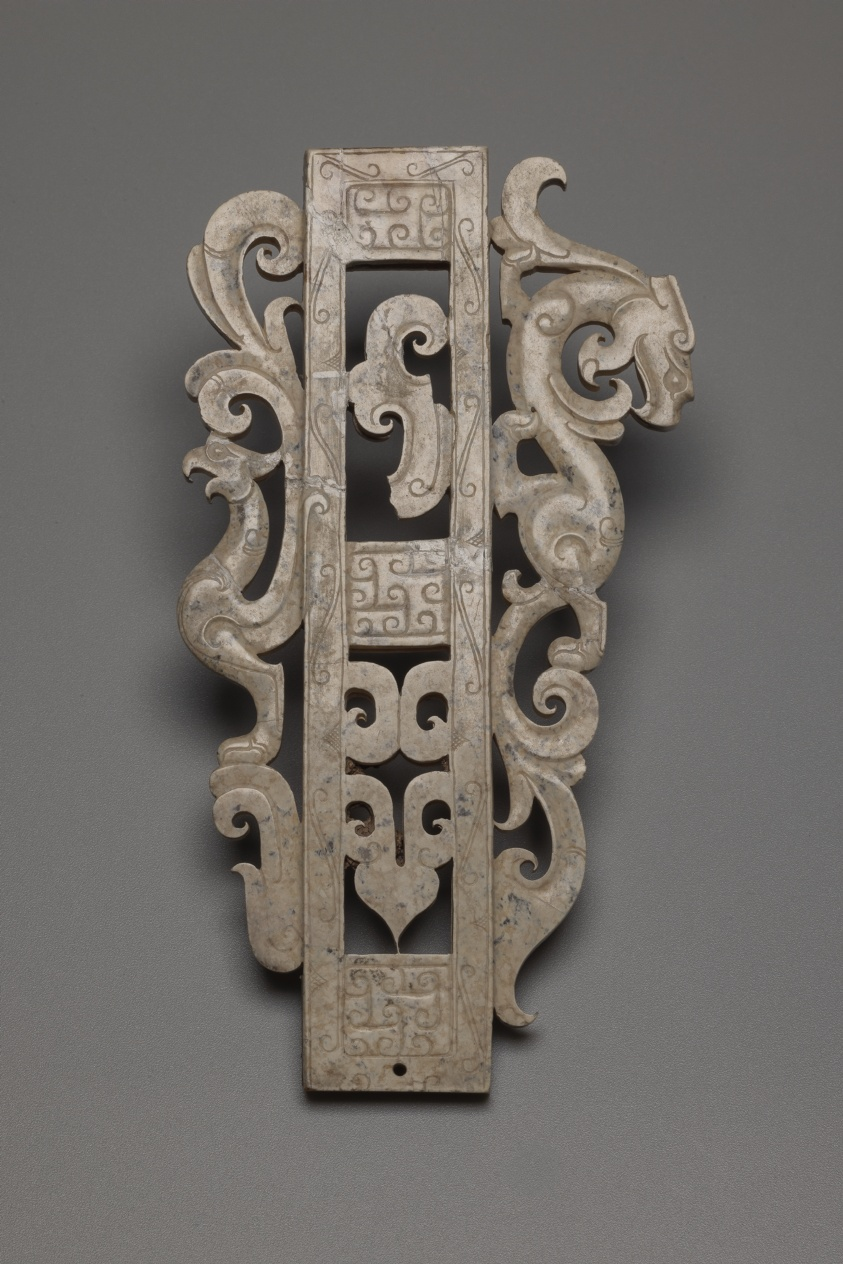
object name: Religious/Ritual Object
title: Sheath with Bird and Feline or Dragon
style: Chinese (culture or style)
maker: China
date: Warring States period to early Western Han dynasty, 3rd/2nd century B.C.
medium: Jade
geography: China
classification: weapon; asian art; ritual objects